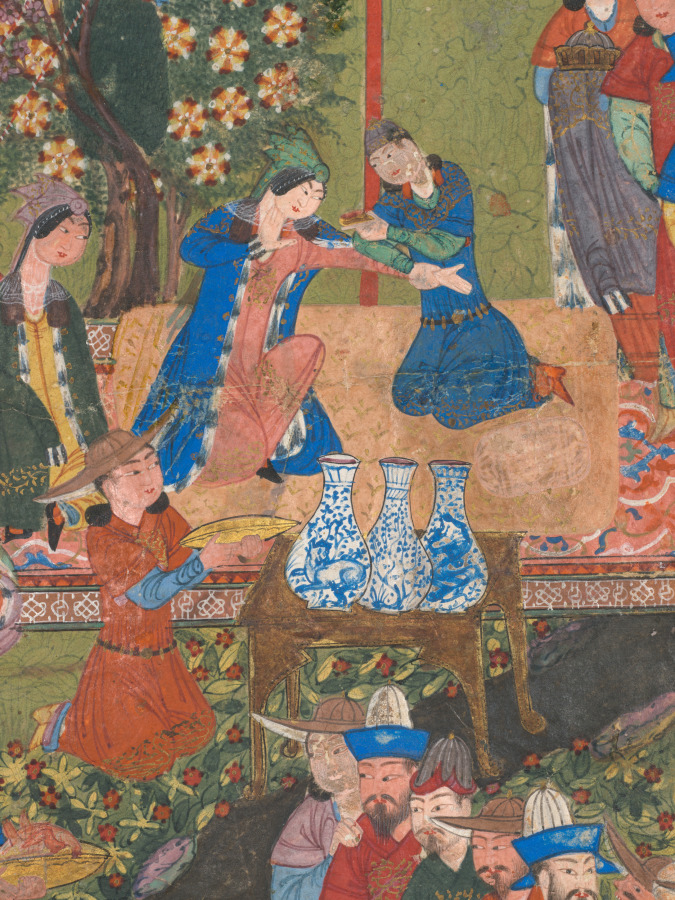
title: Royal Reception in a Landscape, right folio from the double frontispiece of a Shahnama (Book of Kings) of Firdausi (Persian, about 940–1019 or 1025) (verso)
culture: Iran, Shiraz, Timurid period (1370-1501)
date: 1444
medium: opaque watercolor, gold, and silver on paper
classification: Manuscript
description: The painting on the verso of this folio is the first half of a double-page frontispiece now detached from a Shah-nama manuscript (see CMA 1956.10 for the second half of the frontispiece). The scene does not illustrate a narrative from the Shah-nama, but is likely a representation of the courtly audience for whose entertainment the manuscript was created. The date and style of the painting indicate that it was made during the reign of the Timurid dynasty in Shiraz, Iran.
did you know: A musician plays a harp that has been mounted over a stream, painted with now tarnished silver paint.